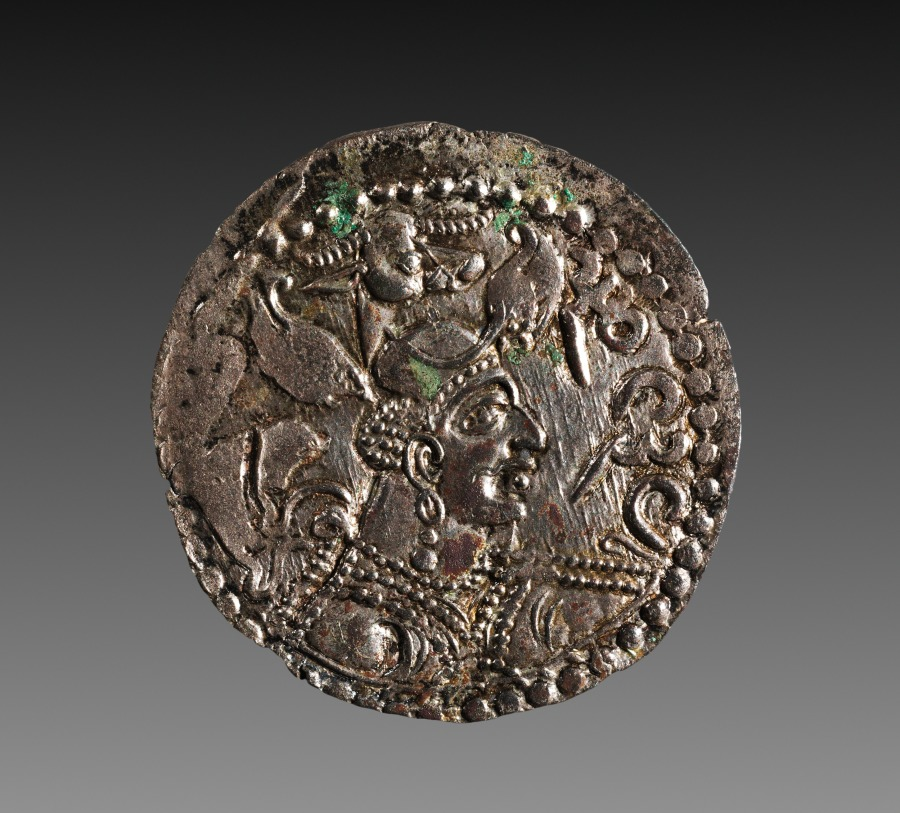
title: Drachm: Bust of Napki Malka (obverse): Fire Altar (reverse)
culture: Hephtalite, minted in Afghanistan, reign of Napki Malka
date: c. 450–500 CE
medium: silver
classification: Coins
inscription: 𐭭𐭩𐭪𐭩 𐭬𐭫𐭪